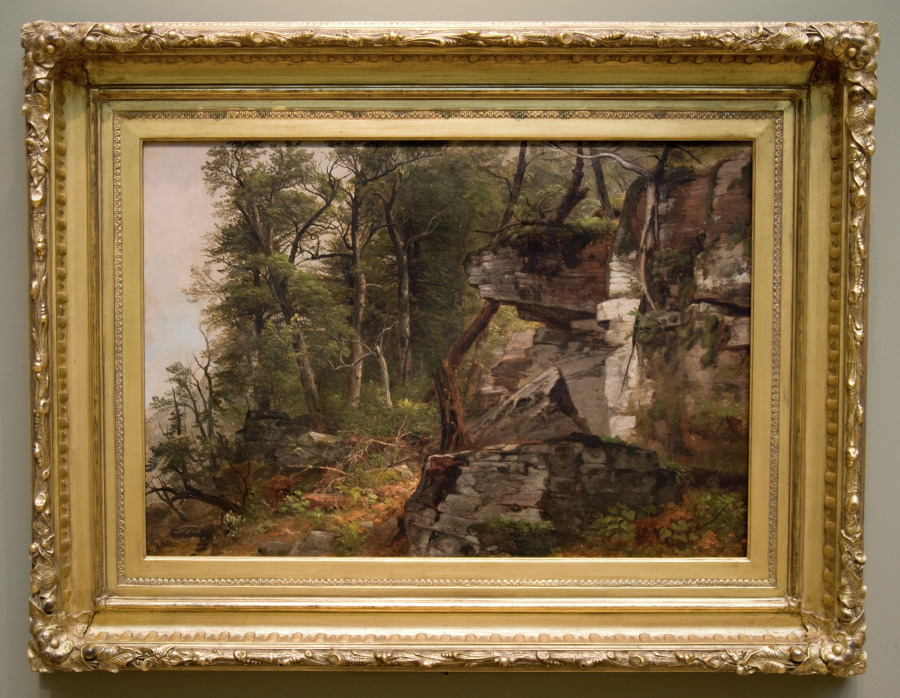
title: Trees on a Rocky Hillside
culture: America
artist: Asher B. Durand (American, 1796–1886)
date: c. 1849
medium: oil on canvas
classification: Painting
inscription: Signed lower left: "ABD"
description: Durand was one of the first American artists to paint outdoors, rather than in the confines of a studio, which was the longstanding tradition. This outdoor oil sketch of a seemingly random corner of the woods offers an intimate view of a rock outcropping amid lush vegetation. Its small-scale, unusually cropped composition contrasts with the sweeping vistas in many other landscapes of the era.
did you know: Before becoming a painter, Durand designed paper currency for the federal government.